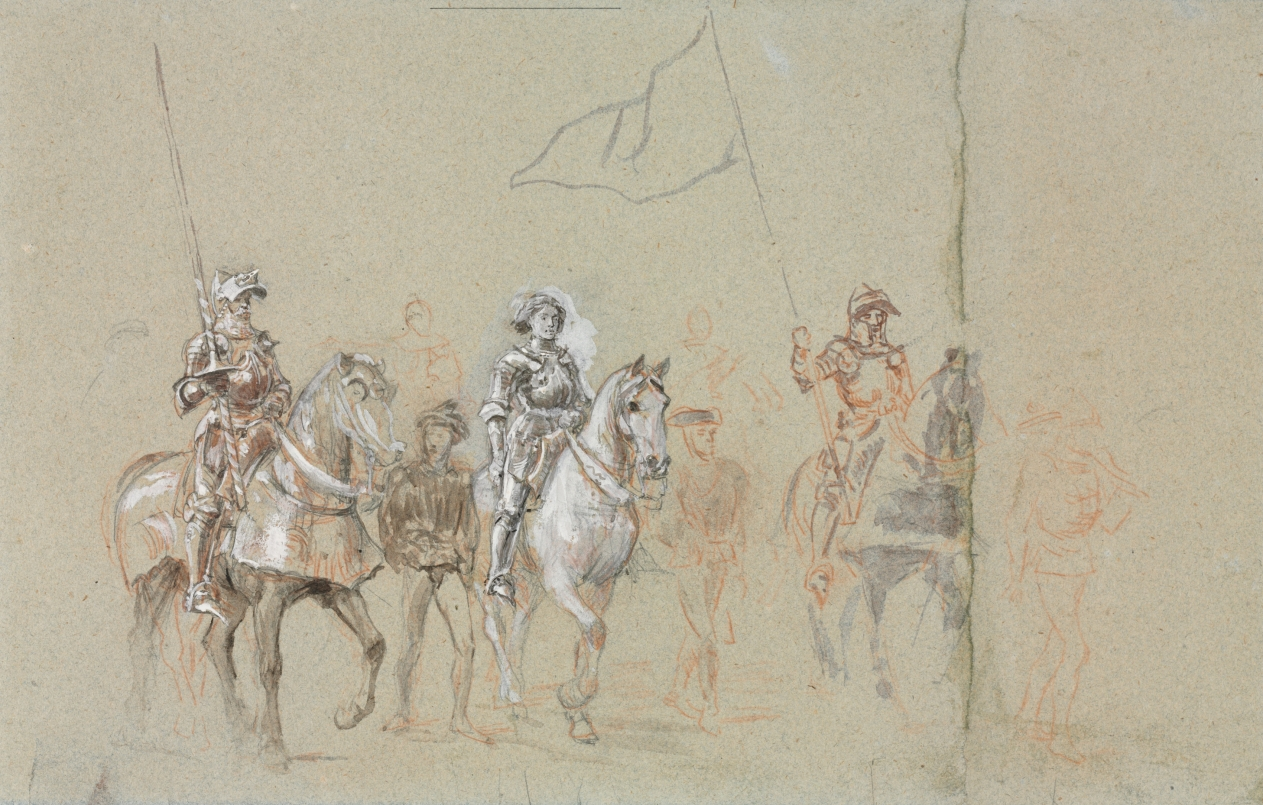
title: Joan of Arc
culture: France, 19th century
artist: Ernest Meissonier (French, 1815–1891)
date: c. 1889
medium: graphite, red chalk, colored washes, and black and white gouache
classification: Drawing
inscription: Signed with monogram, lower left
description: This drawing is a rare study relating to Ernest Meissonier's never-realized mural for the Pantheon in Paris. After seeking and receiving the commission in 1874, Meisonnier procrastinated on the project for many years. Here, the French heroine Joan of Arc appears at center, without a helmet, on a bare white horse, staring ahead with steadfast calm. The figure of Joan in this drawing appears to correspond to the subject in a now-lost design for the complete painting, which Meissonier presented in 1889.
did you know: Ernest Meisonnier found the original subject proposed for his Pantheon mural commission—Saint Geneviève—to be uninspiring and instead proposed an allegorical Triumph of France featuring Joan of Arc alongside Charlemagne and Napoleon Bonaparte, among others.